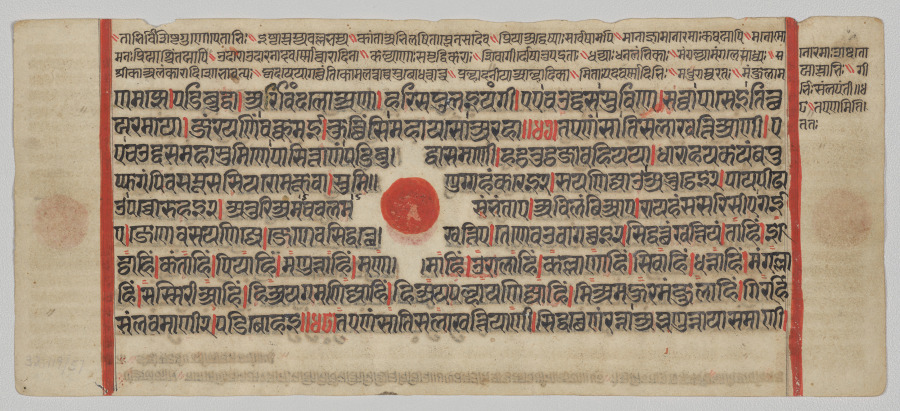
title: Text, Folio 19 (recto), from a Kalpa-sutra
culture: Western India, Gujarat, last quarter of the 15th century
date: c. 1475–1500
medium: Gum tempera, ink, and gold on paper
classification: Painting